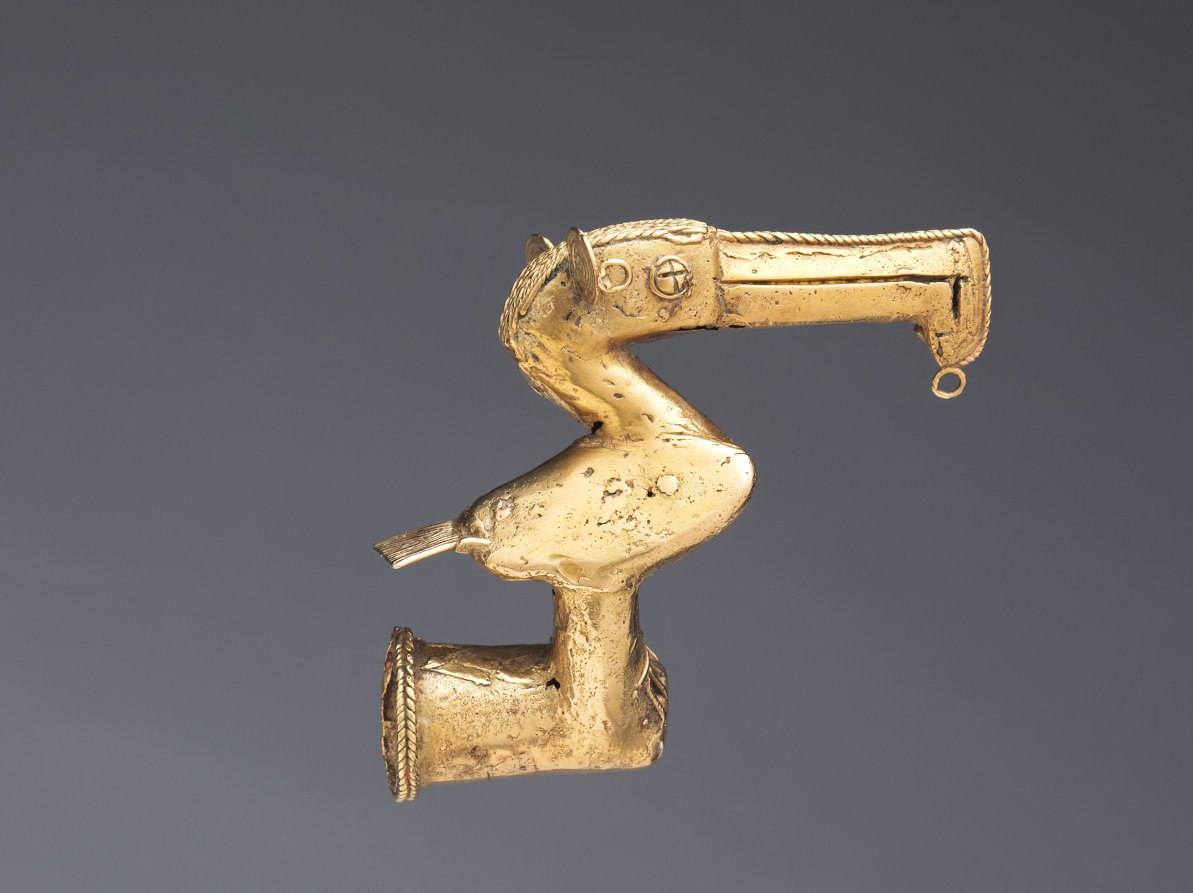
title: Staff Head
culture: Colombia, Sinú style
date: 400–1000 CE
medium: cast gold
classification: Metalwork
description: These finials probably fit over the ends of wooden staffs, emblems of rank. Unique to the Sinú area are finials with an image, often a bird, at a right angle to the base. This orientation suggests that the finials served as the finger grips of ceremonial spear throwers.